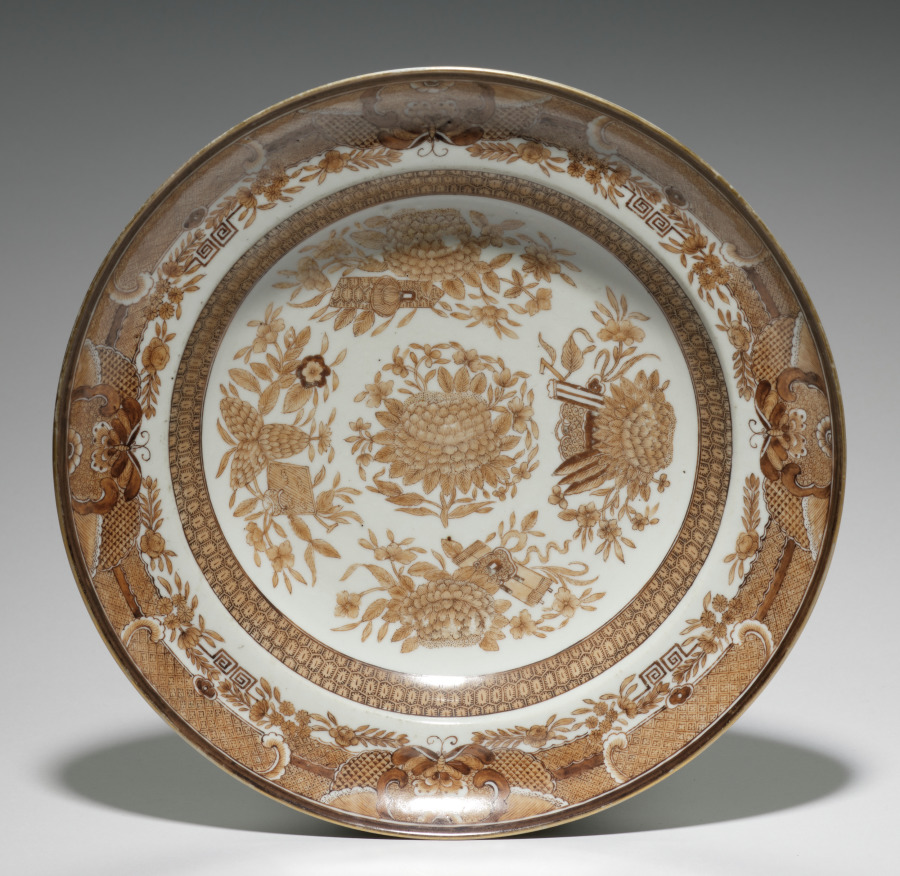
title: Soup Plate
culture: China, Chinese Export -- English or American Market (probably), 19th century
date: c. 1800–1825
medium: porcelain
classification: Ceramic